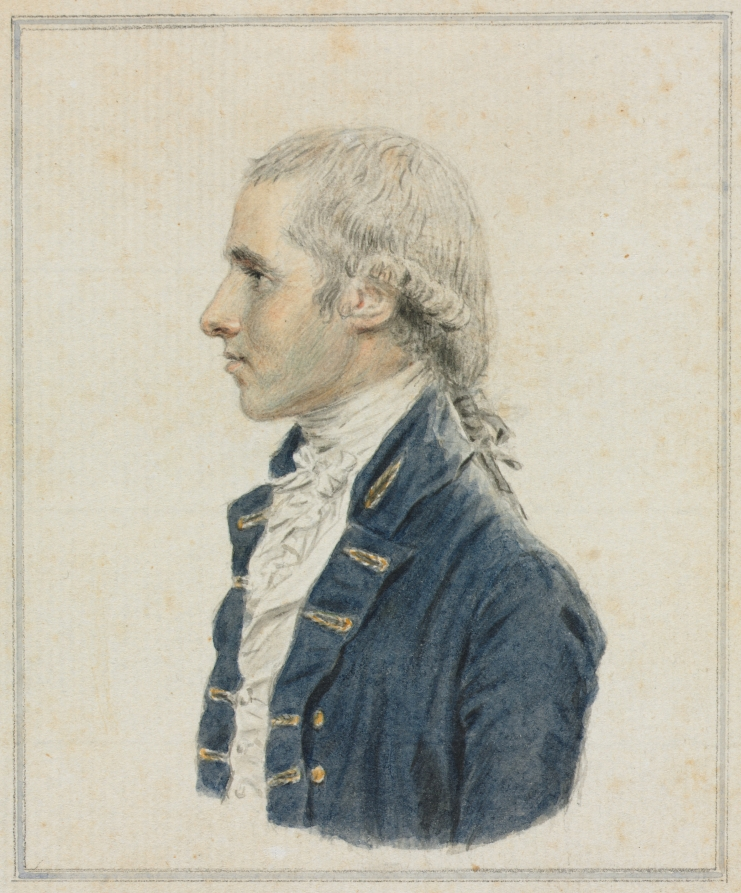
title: Portrait of Sir Captain West of the Dutton Indiaman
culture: England, 18th century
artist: John I Smart (British, 1741–1811)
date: 1785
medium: watercolor over traces of black chalk, with metallic gold paint on laid paper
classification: Portrait Miniature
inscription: by artist, across bottom, in brown ink: Captain West of the Dutton Indiaman 1785 / drawn on board going to Madras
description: Smart painted Captain West’s head in profile, turned to the right. His powdered hair is worn en queue with curls above his ears and white powder on his shoulders. He has long eyelashes, parted lips, and a grayish cast to his skin tone, particularly over his beard. West dons a blue coat with gold buttonholes embroidered in gold and a white waistcoat, high collar, and cravat tied in a small bow. This work is a finished drawing by Smart, evidenced in part by its larger size and by the fact that the painting of the sitter’s clothing is complete and the bust is placed within an elaborate border comprised of blue, metallic gold, and gray lines. This finished quality does not preclude the possibility that the drawing may also have functioned as a preparatory sketch for a miniature on ivory, which has not been located. Captain James West sailed the Dutton Indiaman from England to Madras, India, on several occasions, including Smart’s voyage in 1785. At least one of the sons of British judge Sir Elijah Impey was traveling with Smart on his journey to India and had his portrait taken by the artist. Another of Impey’s sons wrote of an earlier return passage to England made with Captain West in 1784, shedding light on the sea captain’s character and disposition. Impey’s account conveys not only West’s personality but the atmosphere that prevailed on the ship over which the captain presided and on which Smart traveled and worked. As indicated by an inscription in the artist’s hand, this portrait was painted by Smart while he was aboard the Dutton en route to Madras and probably retained by the artist as a memento. In addition to the portrait of “Master Impey,” Smart is known to have taken the likeness of other figures while aboard the Dutton, including the quartermaster “Baker” and a French ship called the Consalateur, which was intercepted by the Dutton while sailing to India. The current location of both works is unknown.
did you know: In 1784 it was written that "Captain James West, had the just reputation of being a first-rate mariner, a well-informed, and thoroughly practical man of business, and in every way worthy of confidential intimacy."